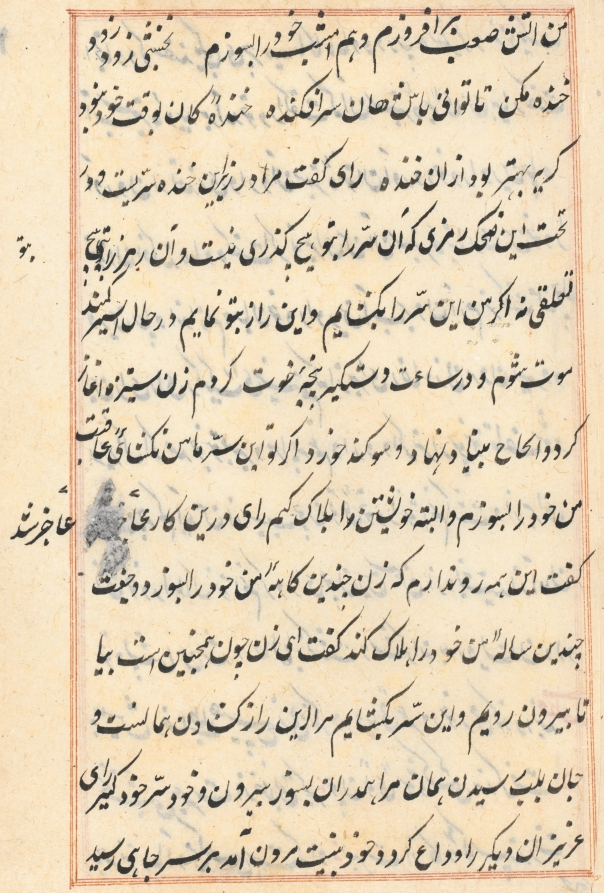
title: Page from Tales of a Parrot (Tuti-nama): text page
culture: Mughal India, court of Akbar (reigned 1556–1605)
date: c. 1560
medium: gum tempera, ink, and gold on paper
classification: Painting